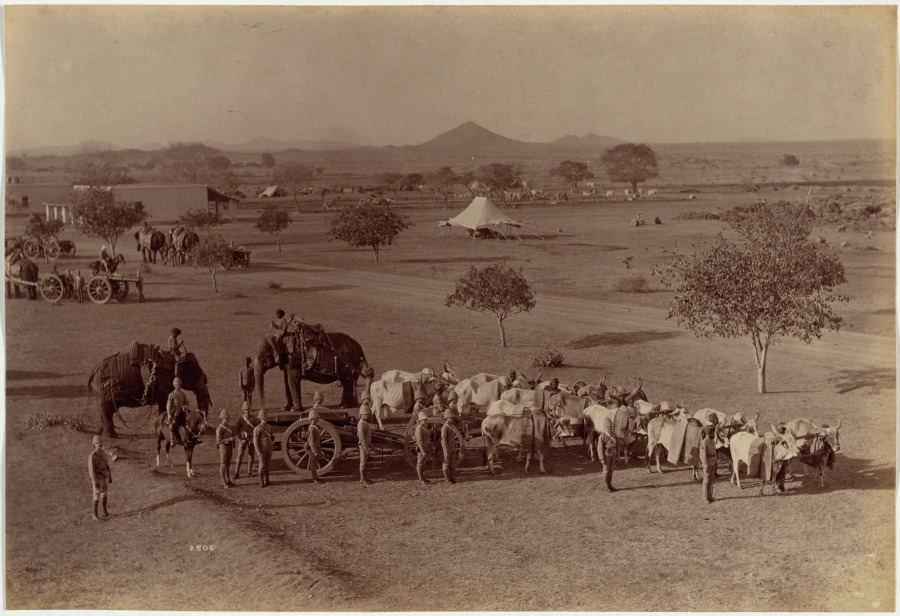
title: Heavy Field Battery, Jhansi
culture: India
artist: Raja Deen Dayal (Indian, 1844–1905)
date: 1886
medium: albumen print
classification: Photograph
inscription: No visible inscriptions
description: Exercises involving elephant batteries, which were exotic to European eyes, attracted spectators; photographs of them were excellent souvenirs of these military forces employed by the British Indian Army. Elephants had been employed in warfare in India since at least the 500s BC, but with the advent of heavy artillery, their function switched from attack to support. They transported big guns and supplies and worked in logging and construction. It took many cattle to pull a load that could be handled by two elephants.